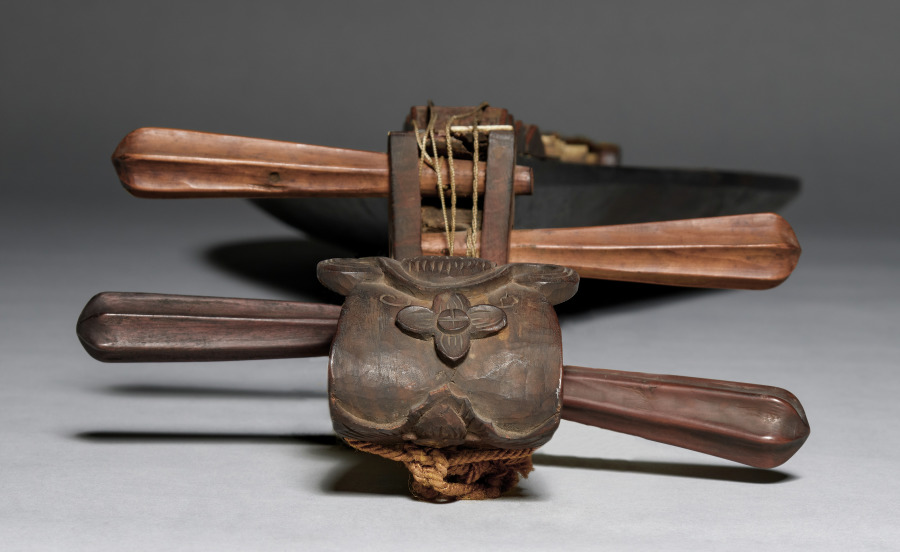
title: Pipa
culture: China, Qing dynasty (1644-1911)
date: 1800s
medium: Wood, ivory, bone, gut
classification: Musical Instrument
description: The term pipa, known since the 3rd century BC, describes the playing motion of the right hand: pi, “to play forward” (left), and pa, “to play backward” (right). A type of lute played with the fingers, it is used in opera and storytelling ensembles and has an impressive, virtuosic solo repertoire. Historic imagery, such as wall paintings, documents the spread of the pipa, along the Silk Road from western and central Asia to China. The bat finial here is a commonly used device on 19th-century Chinese lutes symbolizing good luck.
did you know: The string holder is made of bone.